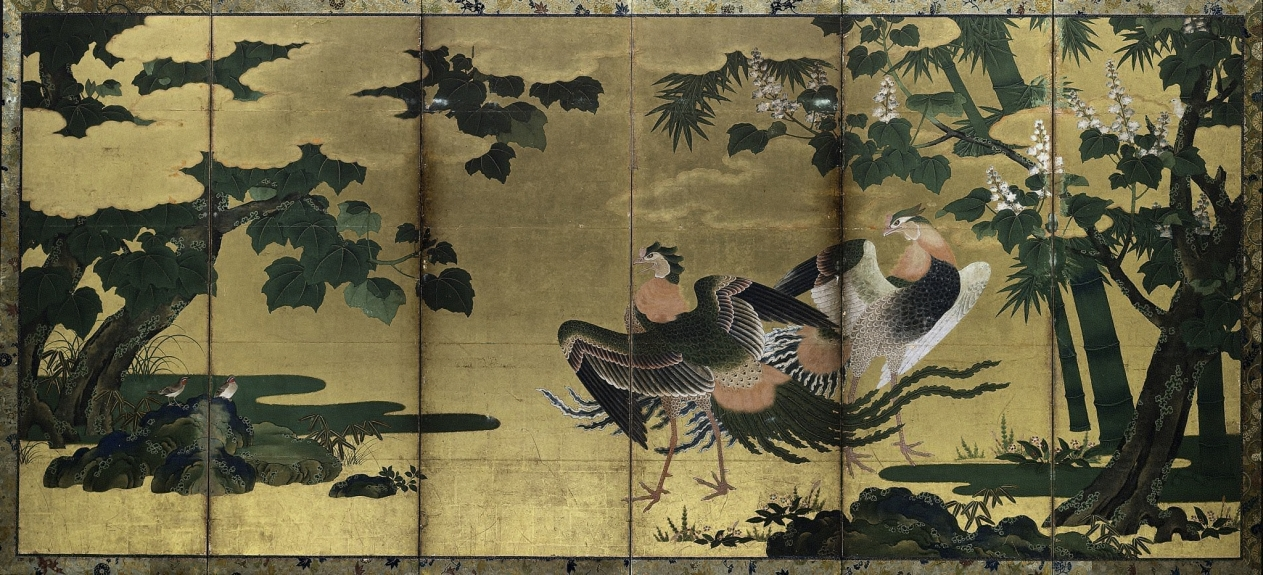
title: Phoenixes and Paulownia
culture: Japan, Momoyama period (1573–1615)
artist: attributed to Tosa Mitsuyoshi (Japanese, 1539–1613)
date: late 1500s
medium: One of a pair of six-panel screens; ink, color, and gold on gilded paper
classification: Painting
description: The immense heraldic birds on display in these byøbu reflect the Momoyama era's spirit of newly gained self-confidence and an affinity for grand expressive statements in painting, architecture, the textile and ceramic arts, as well as garden design. While that period preceded the arrival of prosperity, it clearly marked an extra---ordinary moment in Japanese cultural history, one frequently compared with the twelfth century of the Heian period. Through the extensive use of gold-foil backgrounds rather than the somber palette of carefully orchestrated ink tones evident in Muromachi byøbu, patrons colla-borated with artists as well as craftsmen in fostering a decidedly new look in much of Japanese painting. Here for instance there is no imaginary vista suggesting China's vast waterways and mountain ranges. The setting is composed instead of highly stylized lozenges of mineral green paint, suggesting the earth from which clumps of grass, flowering plants, and towering bamboo and paulownia trees emerge. Clusters of lumpy, blue-green rocks dotted with lichen provide stabilizing three-dimensional foils for these islands of vegetation as well as the all-encompassing flat, golden surface. The glorious artificiality of the setting precisely serves the artist's effort to compose a credible yet other-worldly vista for depicting the legendary phoenix gazing across the landscape at the pair of peacocks. Rather than an emblem of immortality, as it is in Western lore, in Japan the phoenix evolved out of its origins in Chinese mythology to become, by the sixteenth century, an auspicious symbol of political authority. Together with clusters of the distinctively shaped paulownia leaves, this long-tailed, mythical bird graced lacquerware as well as mural paintings, proclaiming an air of graceful com-mand. A characteristic infusion of temporality has been included also, through a seasonal flowering schema extending from spring to early summer (right) to fall and the advent of winter (left). Although traditionally attributed to the Tosa school master Tosa Mitsuyoshi (1539-1613), these byøbu possess neither seals nor signatures to confirm that authorship. Known for his jewel-like, modest-sized album paintings of courtly narratives such as The Tale of Genji, it is likely both studio training and contemporary fashions in patronage conspired to produce a good number of such byøbu. This example from the Momoyama era represents one such effort from a masterful Tosa painter, too little seen in Western collections.